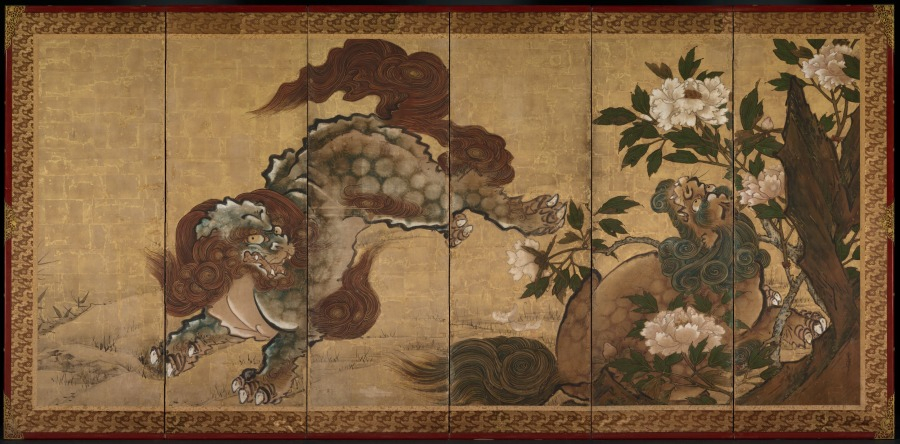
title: Lions and Tigers in Peony and Bamboo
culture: Japan, Edo period (1615–1868)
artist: Yamaguchi Sekkei (Japanese, 1644–1732)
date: 1668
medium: One of a pair of six-panel folding screens; ink and color on gilded paper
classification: Painting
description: Sekkei lived and studied painting in Kyoto at the Kano school studio, the center of traditional painting activity in Japan since 1500. The use of gold foil as a backdrop for the frolicking animals served a practical as well as a decorative function. Because traditional Japanese rooms had no windows, interior lighting came from portable oil lamps and wax candles, whose effects were magnified by reflective surfaces.